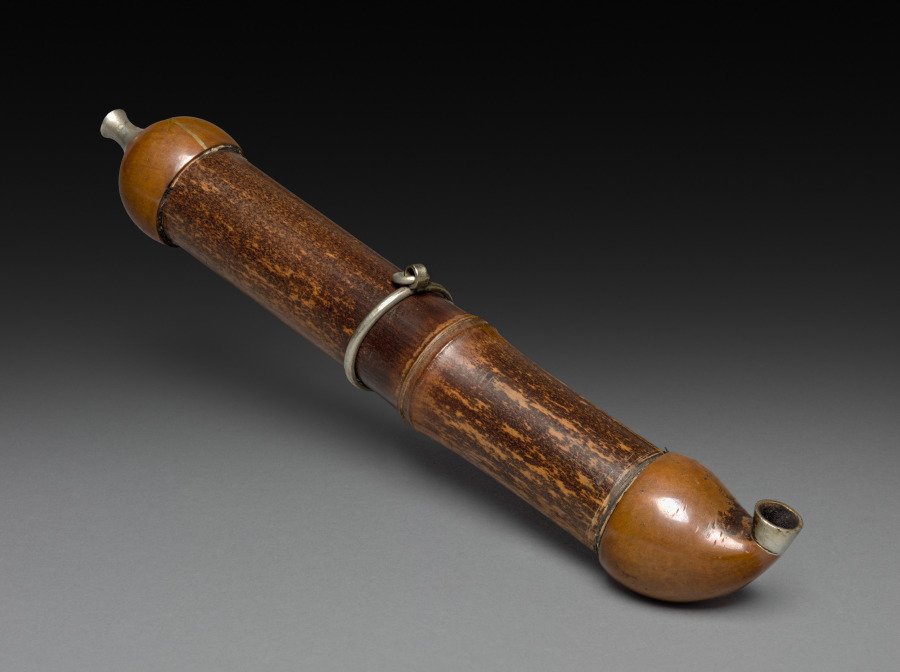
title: Tobacco Pipe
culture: Japan, Edo period (1615–1868)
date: 1700s to mid-1800s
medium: bamboo and metal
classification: Miscellaneous